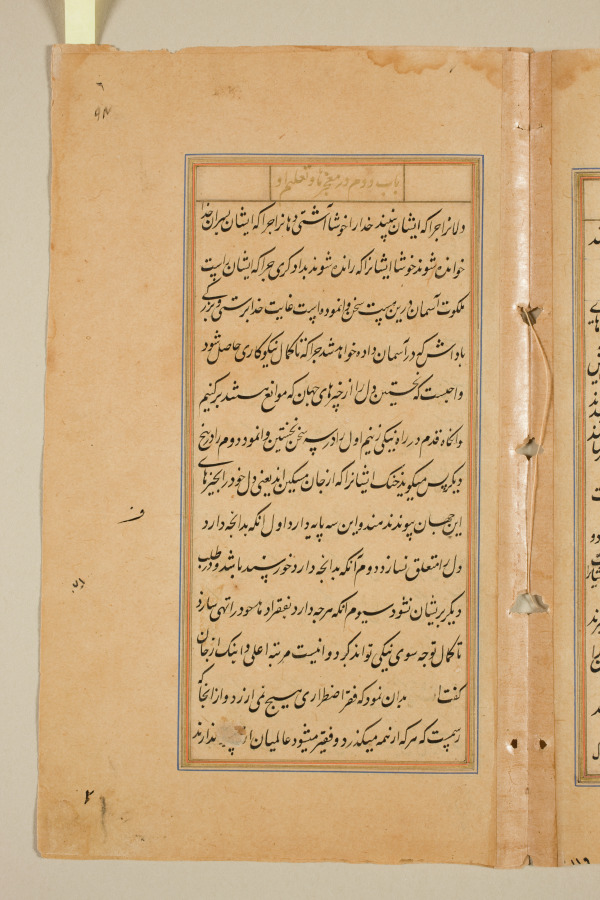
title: Text page from a Mirror of Holiness (Mir’at al-quds) of Father Jerome Xavier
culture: Mughal India, Allahabad, made for Prince Salim (1569–1627)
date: 1602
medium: Ink and gold on paper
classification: Manuscript